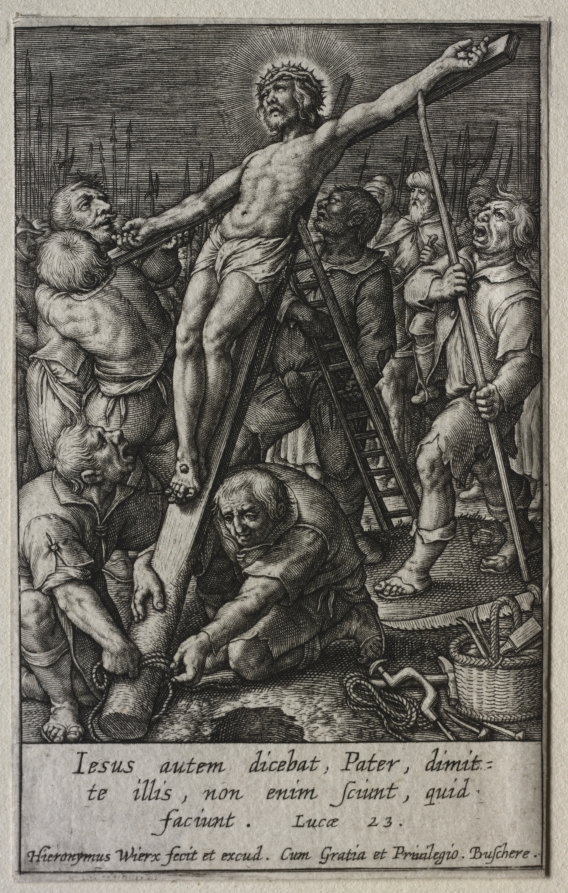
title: The Passion: The Raising of the Cross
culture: Flanders, late 16th-early 17th century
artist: Hieronymus Wierix (Flemish, 1553–1619)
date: before 1619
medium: engraving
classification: Print